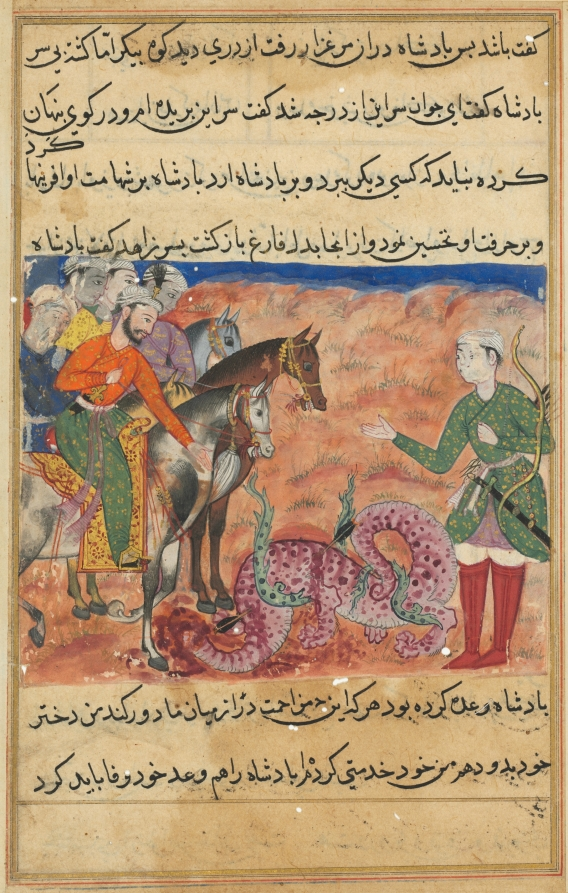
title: The pious man’s son presents the slain dragon to the king, from a Tuti-nama (Tales of a Parrot): Fifty-second Night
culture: Mughal India, court of Akbar (reigned 1556–1605)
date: c. 1560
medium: gum tempera, ink, and gold on paper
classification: Painting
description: The king, wearing an orange tunic, is astounded, and he gestures to the headless body of the dragon, pierced with poisoned arrows, on the ground before him. Impressed by the young man’s courage and skill, the king allows him to marry his daughter and names him vice-regent.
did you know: The king is distinguished by the sarpech, or plume ornament, in his turban.